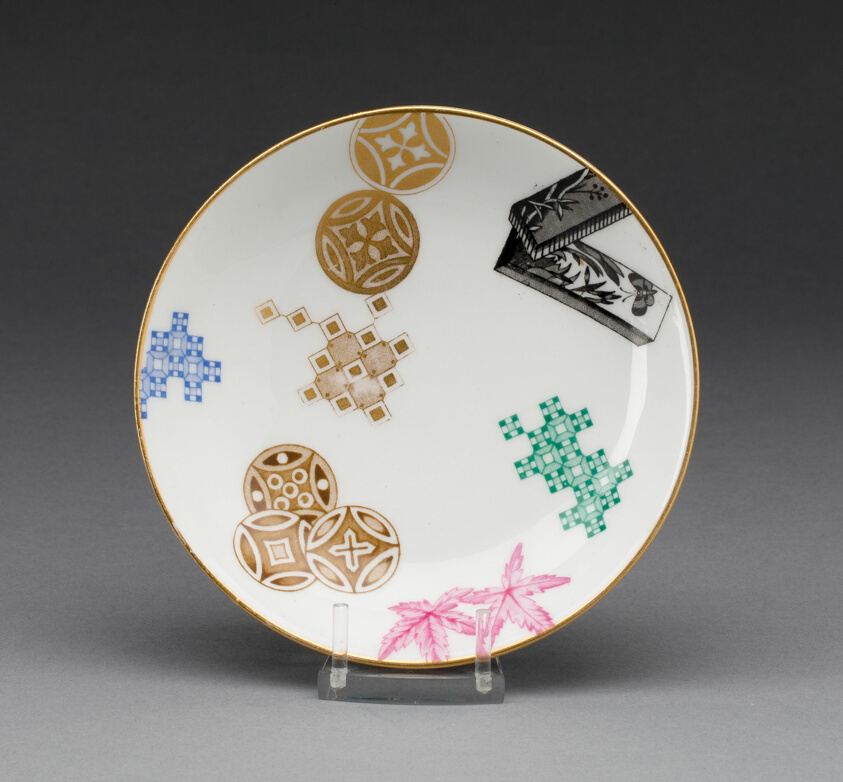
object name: Ceramics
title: Saucer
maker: Worcester Porcelain Factory (Worcester Royal Porcelain Company, 1862-1958); Worcester, England, founded 1751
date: 1878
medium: Soft-paste porcelain, polychrome enamels and gilding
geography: Worcester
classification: ceramics; teaware; porcelain; european decorative arts